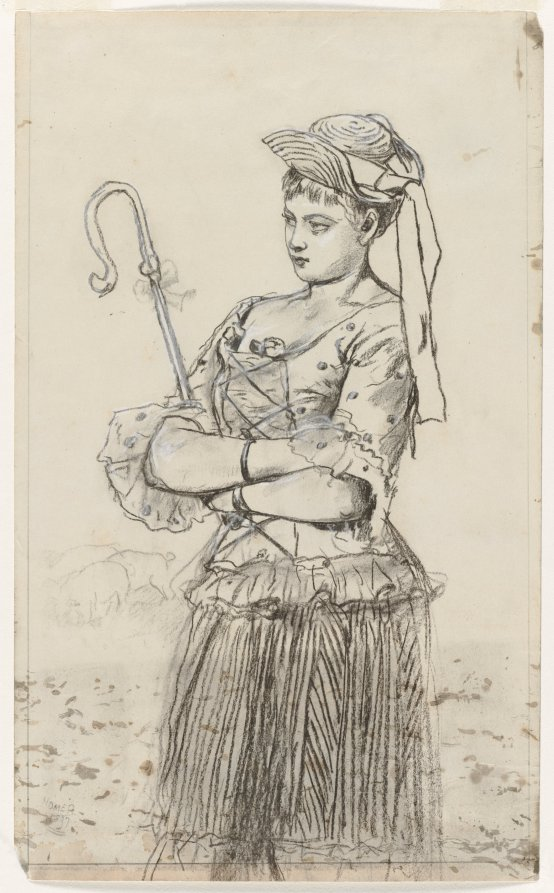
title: Shepherdess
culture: America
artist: Winslow Homer (American, 1836–1910)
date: c. 1878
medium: charcoal with brush and brown wash, heightened with white chalk; framing lines in graphite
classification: Drawing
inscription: [falsely signed?], lower left, in graphite: HOMER / 1897 ; VERSO, center left, in black crayon : 62 [within a square]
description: Homer spent the summer of 1878 at Mountainsville, New York, where his brother's business partner, Lawson Valentine, had a country place called Houghton Farm. While there he developed pastoral images of shepherdesses. The flirtatious quality of these depictions becomes intriguing when we consider that Homer never married, and that he worked not only from female models but also sometimes from boys in girls' clothing.